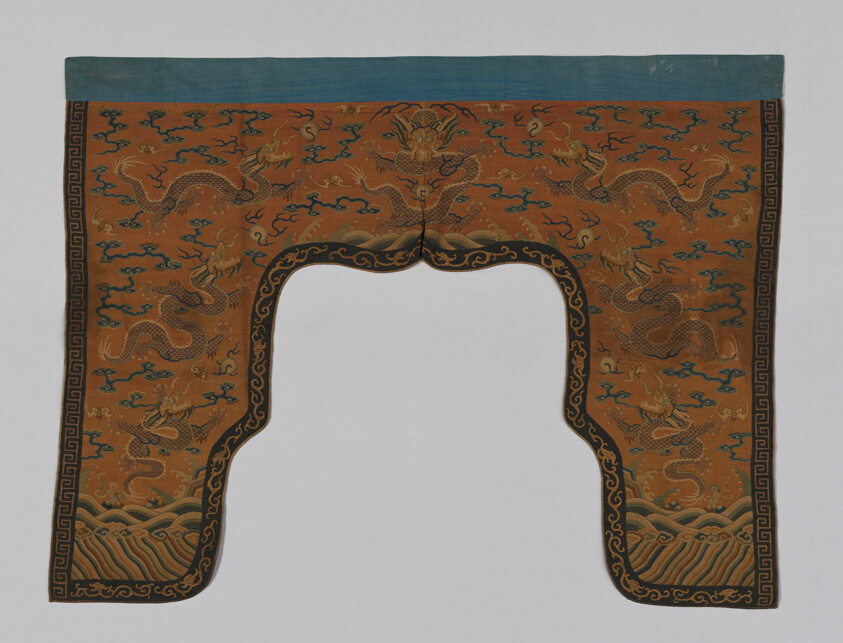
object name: Textile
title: Shrine Surround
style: qing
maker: China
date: Qing dynasty(1644–1911), 1750/1800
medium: Silk and gold-leaf-over-lacquered-paper-strip-wrapped silk, slit tapesty weave (kossu) with eccentric wefts; edged with silk, warp-float faced satin weave; lined with cotton, plain weave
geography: China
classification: textile; weaving